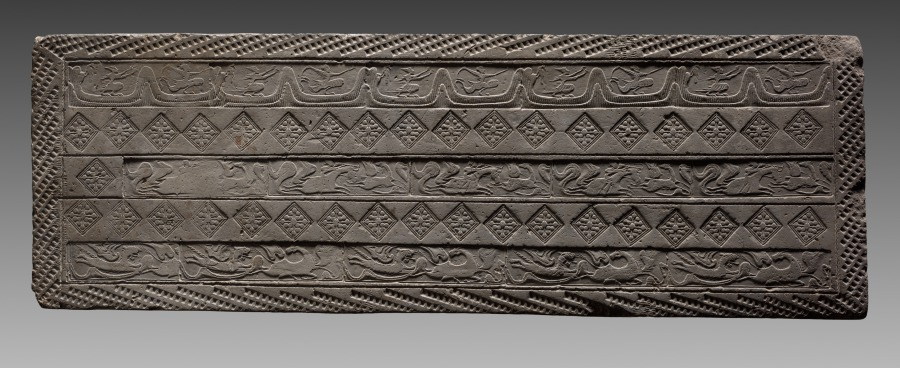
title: Tomb Tile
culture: China, Han dynasty (202 BCE–220 CE)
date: 206 BCE–220 CE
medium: earthenware with stamped decoration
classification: Ceramic